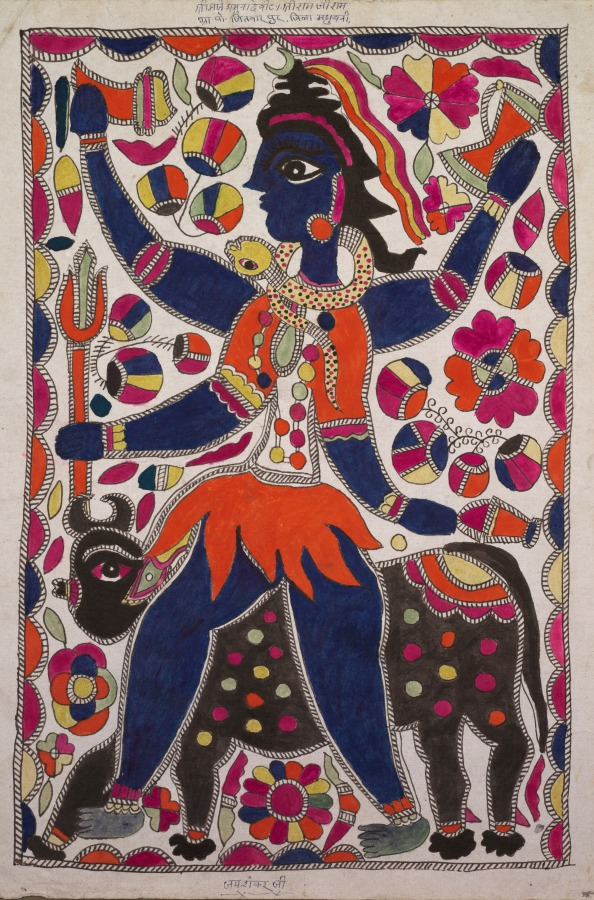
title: Shiva and Nandi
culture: Eastern India, Bihar State, Mithila or Madhubani School, 20th century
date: 1900s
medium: ink and color on paper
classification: Painting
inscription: [[lower center]] jaya shankar-ji